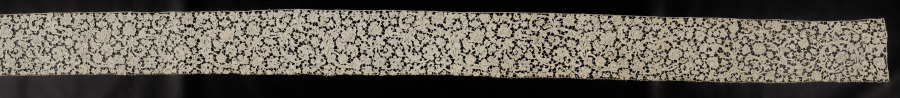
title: Lace Bed Valance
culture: Italy, Venice, 1660-1699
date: 1660–1699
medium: Needle lace (Venetian Raised Point)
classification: Lace